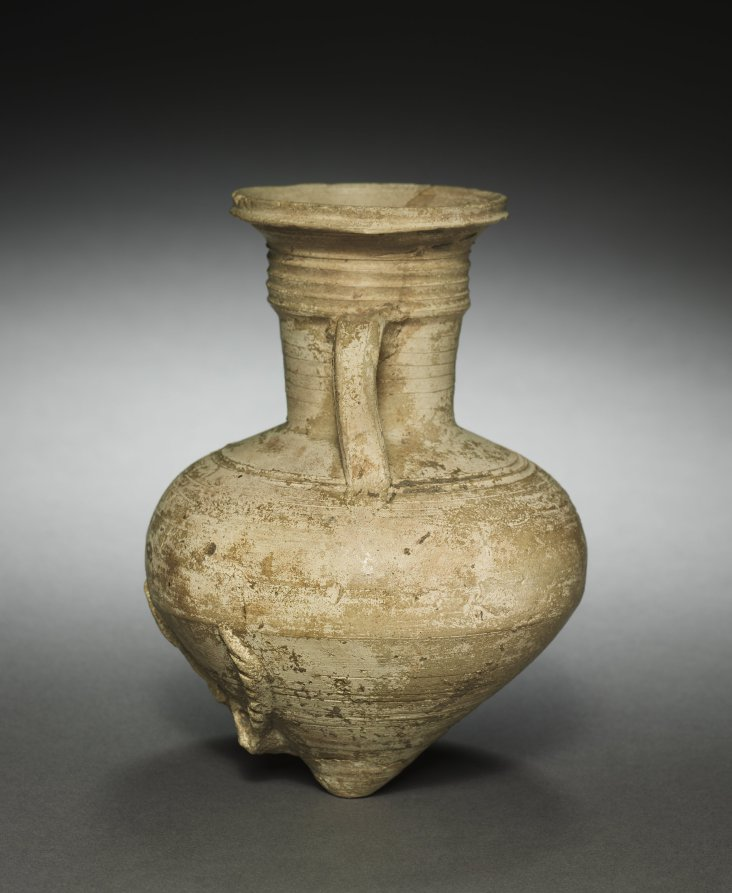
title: Vase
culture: Parthian Empire (247 BCE–224 CE)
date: 1–200 CE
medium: terracotta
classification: Ceramic